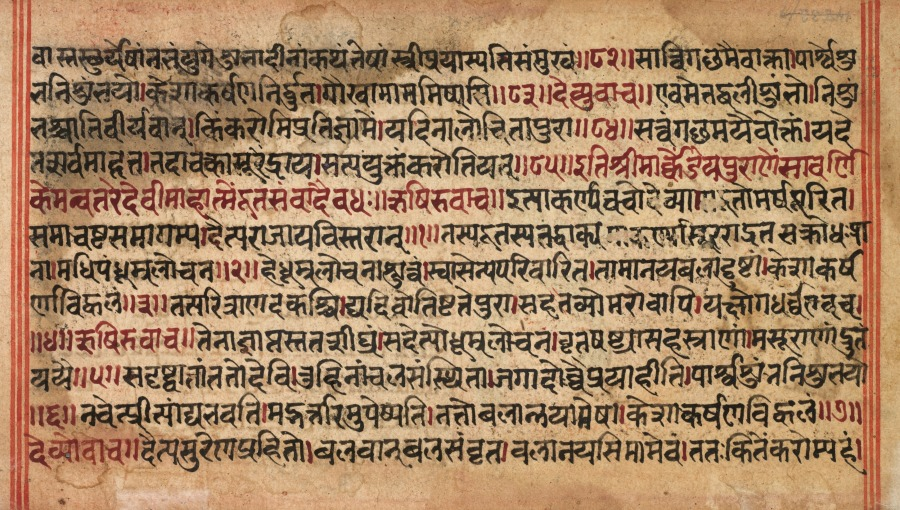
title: Devi Attacking a Demon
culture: India, Rajasthan, Possibly Sirohi, 17th century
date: c. 1630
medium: Gum tempera, ink, and gold on paper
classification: Painting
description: The horizontal format of this sacred text is derived from the earlier use of palm leaves instead of paper. This page is from the foundational work of scripture for worshippers of the great goddess Devi. In her warrior aspect, or incarnation, Devi is multiarmed, rides a lion, and conquers demons more powerful than all the male gods. The demon holding a mountain above his head as a missile is dressed in the Central Asian belted tunic and pants of the Mughals, who ruled most of India at the time this painting was made. Devi wears the Mughal women’s style of tall flat-topped feathered headdress, and she holds a bottle and cup of liquor. Aside from these Mughal elements, the style remains staunchly indigenous, with unmodeled figures in strict profile against a flat red ground.